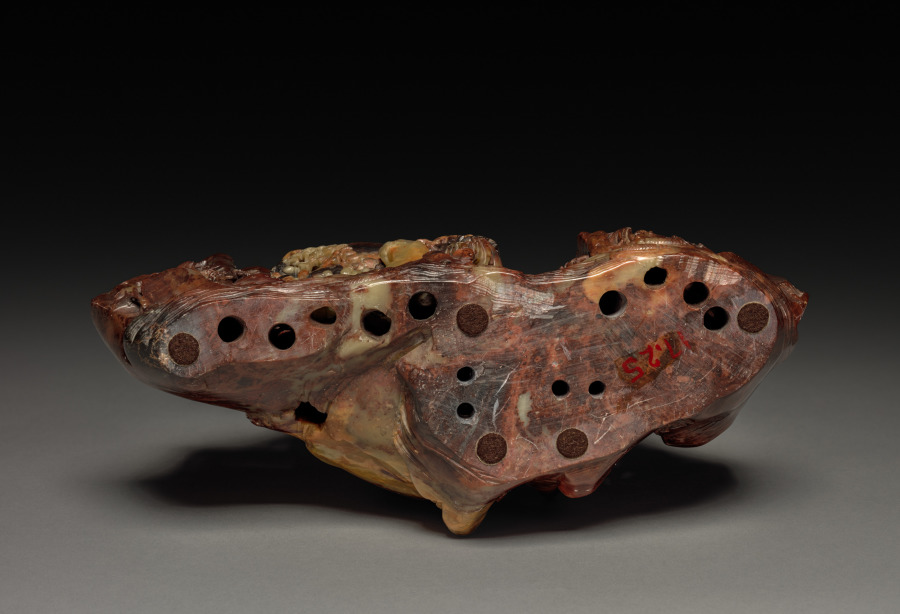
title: Landscape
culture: China, Qing dynasty (1644-1911)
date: 1644–1911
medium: soapstone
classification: Stone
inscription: 石門洞天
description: A mountain scenery surrounded by water and fish is meticulously carved out of soapstone, with a pond, bridge, waterfall, and temple front in its center. The unidentified figure scene on the left includes an ox and a man wearing what appears to be a Korean hat. A Buddha figure hidden in the depth of the temple can be glimpsed from the backside. The inscribed pillar on the right reads “Stonegate Cave to Heaven (shimen dongtian)”. Indentations all over the stone suggest that the miniature mountain was once adorned with precious stones and metal, presumably representing an earthly paradise to which one could escape in one’s mind and imagination.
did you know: A waterfall plummets down the cliff by the temple and then flows smoothly down to join the river at the front of the landscape scene.